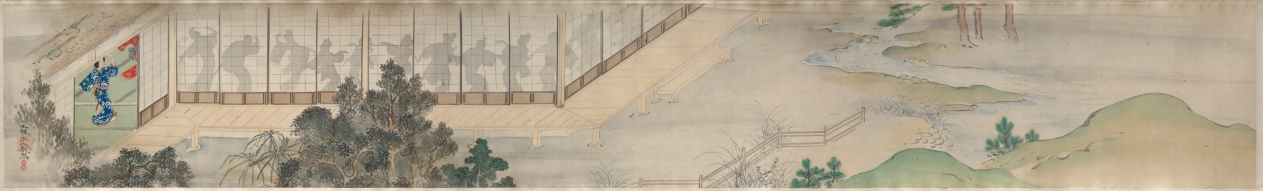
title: The Shadow Dancers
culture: Japan, Edo period (1615–1868)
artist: Yamamoto Baiitsu (Japanese, 1783–1856)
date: 1800s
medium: handscroll, ink and color on silk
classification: Painting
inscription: artist's signature and two seals at end of painting.